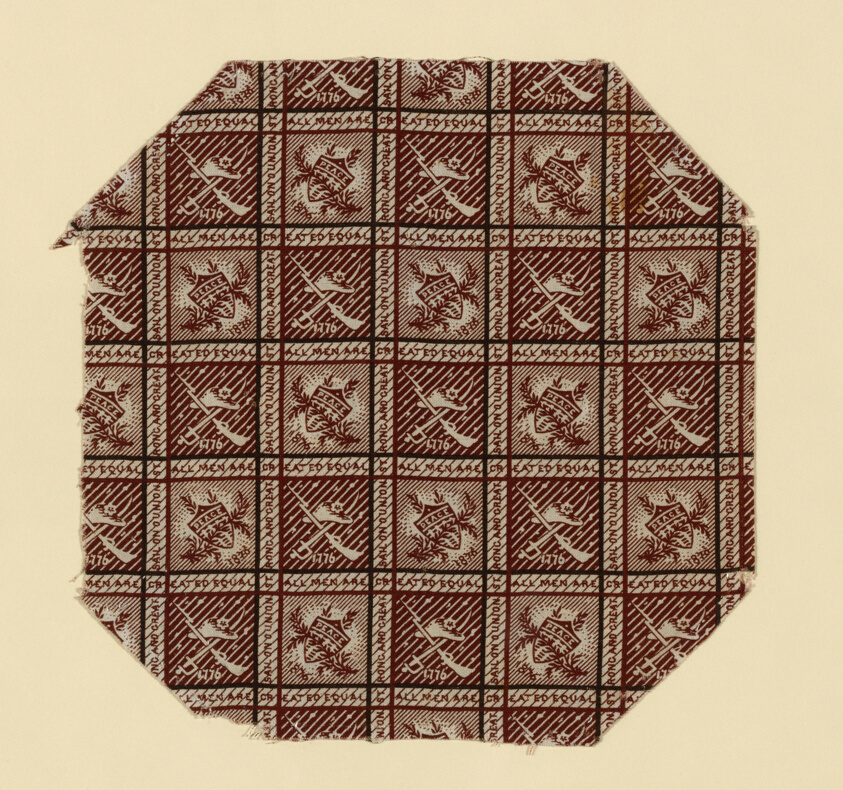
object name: Textile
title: Fragment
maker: United States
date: 1876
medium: Cotton, plain weave; roller printed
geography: United States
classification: textile; weaving - printed; furnishing textile